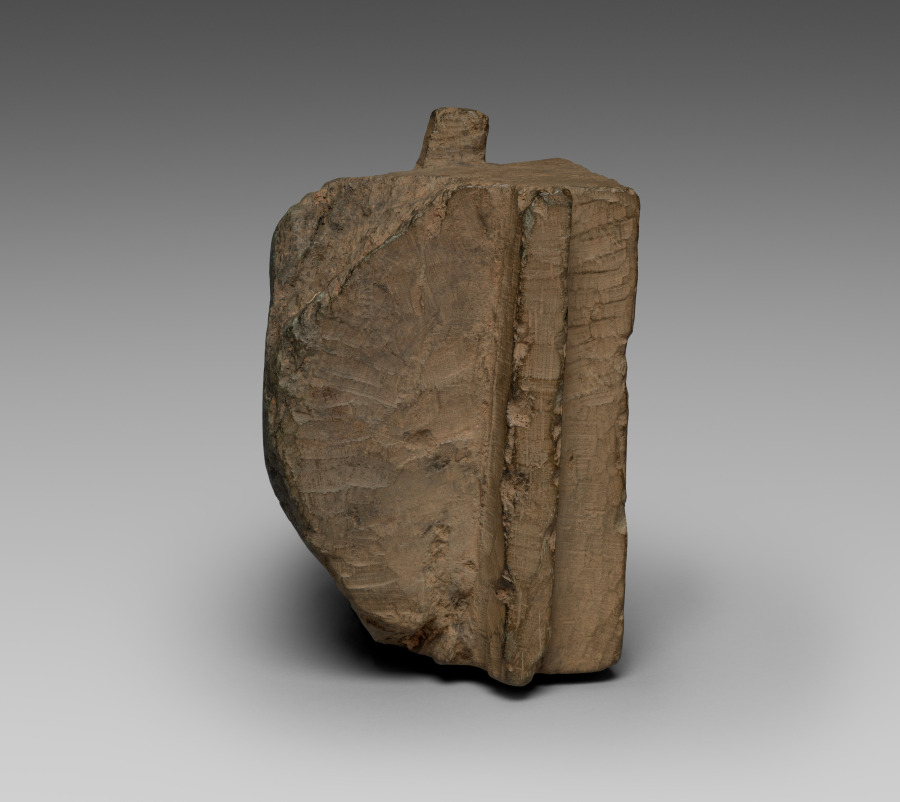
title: Architectural Bracket with Wrestlers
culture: Pakistan, Gandhara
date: 100s–200s CE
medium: schist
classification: Sculpture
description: This sculpture probably derived from Greco-Roman prototypes of nude athletes, but here it has probably been transposed into a scene from the boyhood of the Buddha, when it is said that he excelled in all forms of athletics.